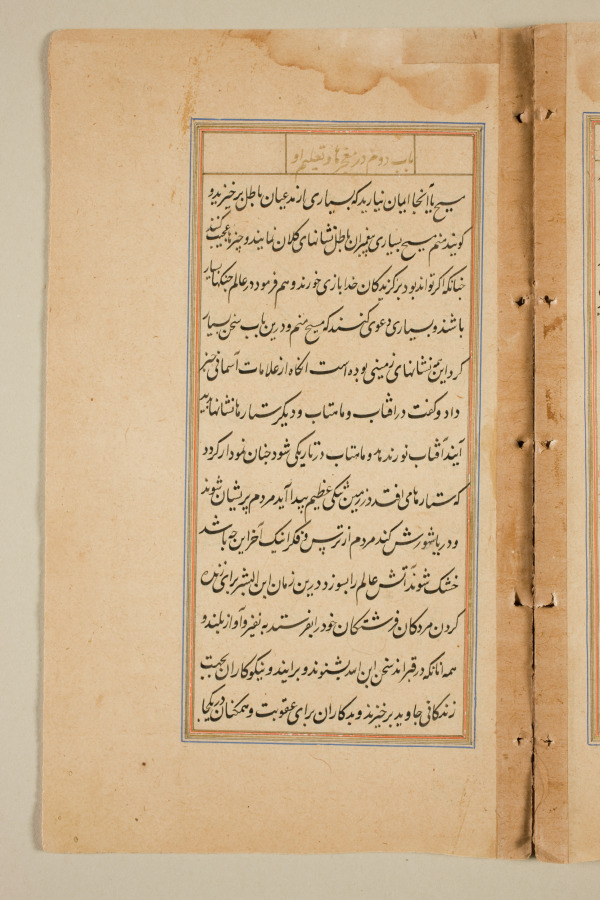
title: Text page from a Mirror of Holiness (Mir’at al-quds) of Father Jerome Xavier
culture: Mughal India, Allahabad, made for Prince Salim (1569–1627)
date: 1602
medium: Ink and gold on paper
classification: Manuscript